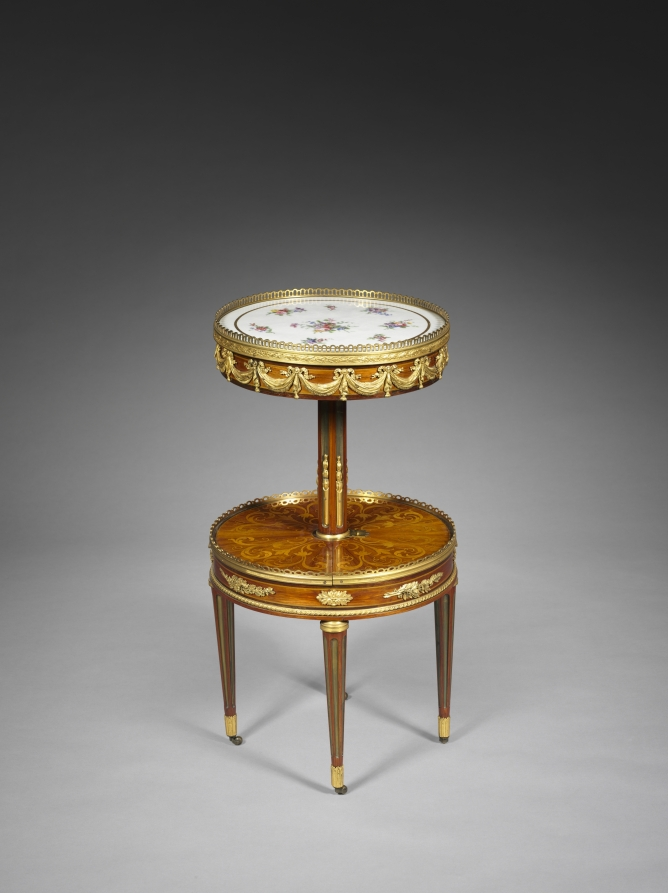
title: Worktable (Bureau de Toilette)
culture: France, Paris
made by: Martin Carlin (French, 1730–1785)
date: c. 1755–1785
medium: wood marquetry with gilt bronze mounts, Sèvres porcelain top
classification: Furniture and woodwork